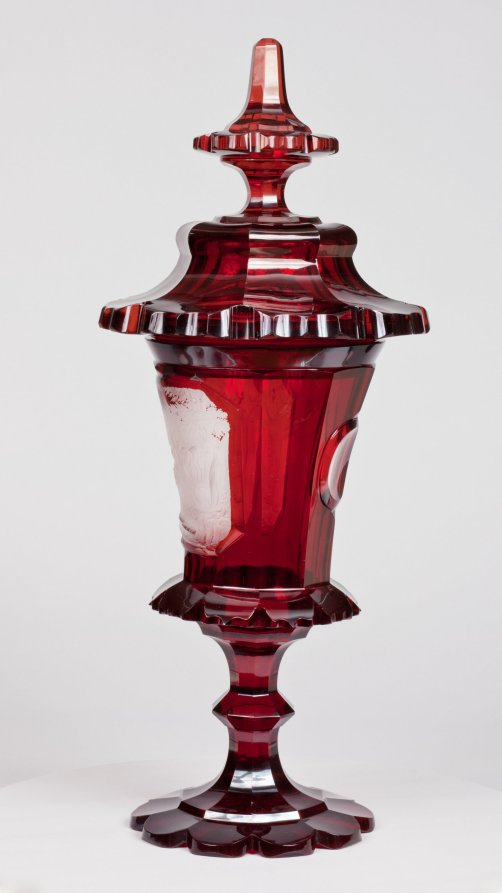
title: Covered Cup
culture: Bohemia, 19th century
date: mid-1800s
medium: ruby glass with engraved decoration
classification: Glass